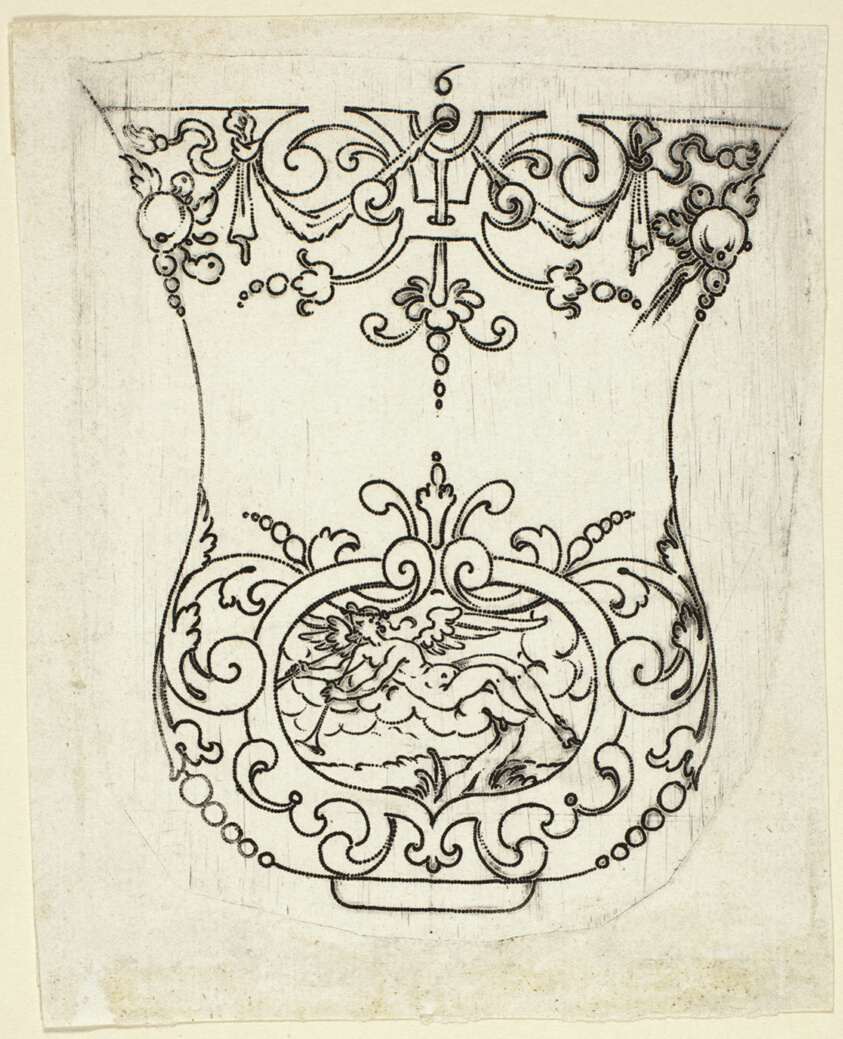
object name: Print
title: Plate 6, from XX Stuck zum (ornamental designs for goblets and beakers)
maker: Master A.P. (German, active early 17th century)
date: 1601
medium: Punch engraving in black on ivory laid paper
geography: Germany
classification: engraving; print; prints and drawing